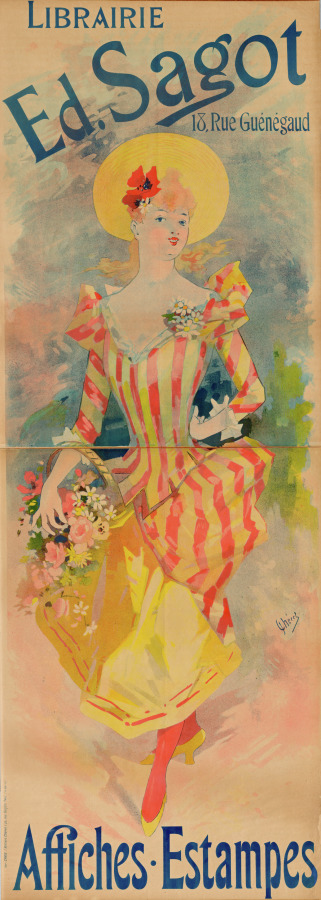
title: Bookstore Ed. Sagot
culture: France, Paris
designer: Jules Chéret (French, 1836–1932)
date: 1891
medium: color lithograph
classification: Print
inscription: on back of upper sheet, in pencil: Cheret - Ed. Sagot